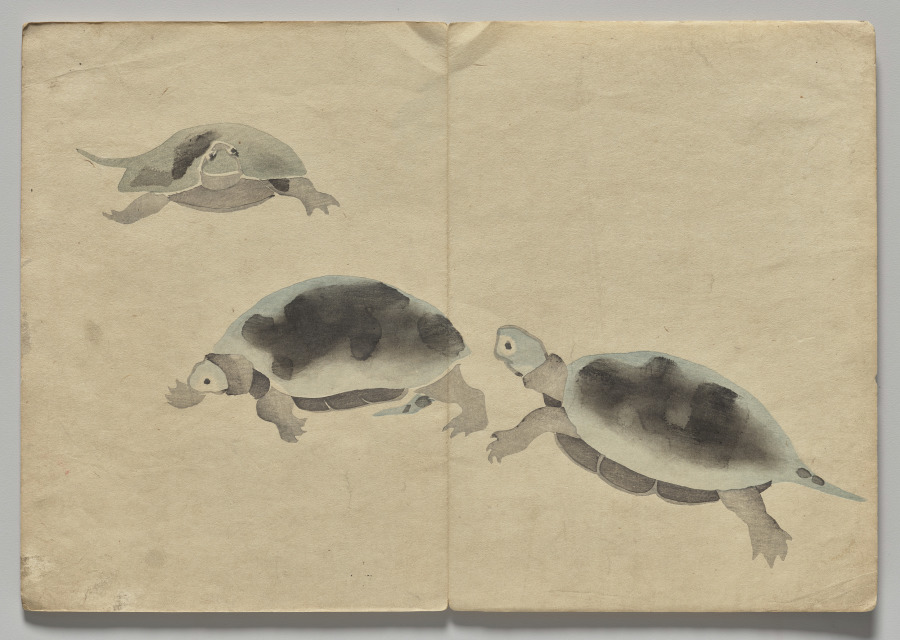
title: Scene from The Kōrin Picture Book (Volume 2)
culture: Japan, Edo period (1615–1868)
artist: Nakamura Hōchū (Japanese, d. 1819)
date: 1800s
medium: color woodblock printed book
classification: Bound Volume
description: Ogata Korin (1658-1716) was one of the most admired artists of Rimpa, or "decorative school painting." These books by the charming later-generation Rimpa artist Hochu record Korin's inventive designs.